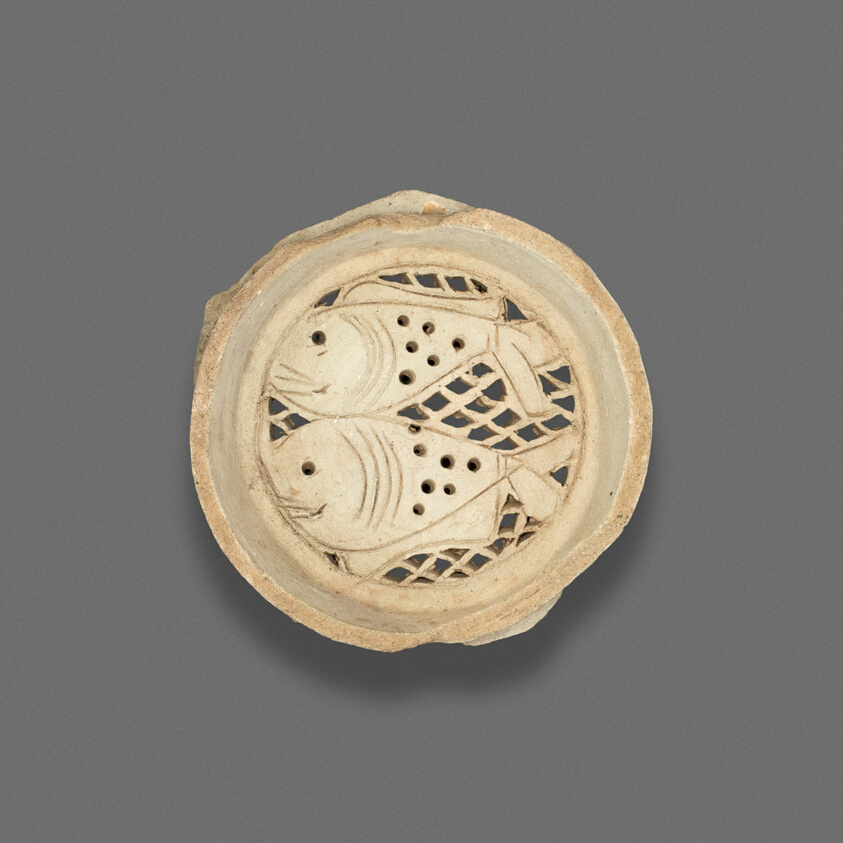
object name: Ceramics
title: Water Filter with Paired Fish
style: fostat, fatimid, Islamic (culture or style)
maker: Egypt; Fustat (Cairo)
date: Fatimid dynasty (969–1171), 11th/12th century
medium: Earthenware with pierced and incised decoration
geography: Old Cairo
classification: ceramics; asian art; architectural fragment